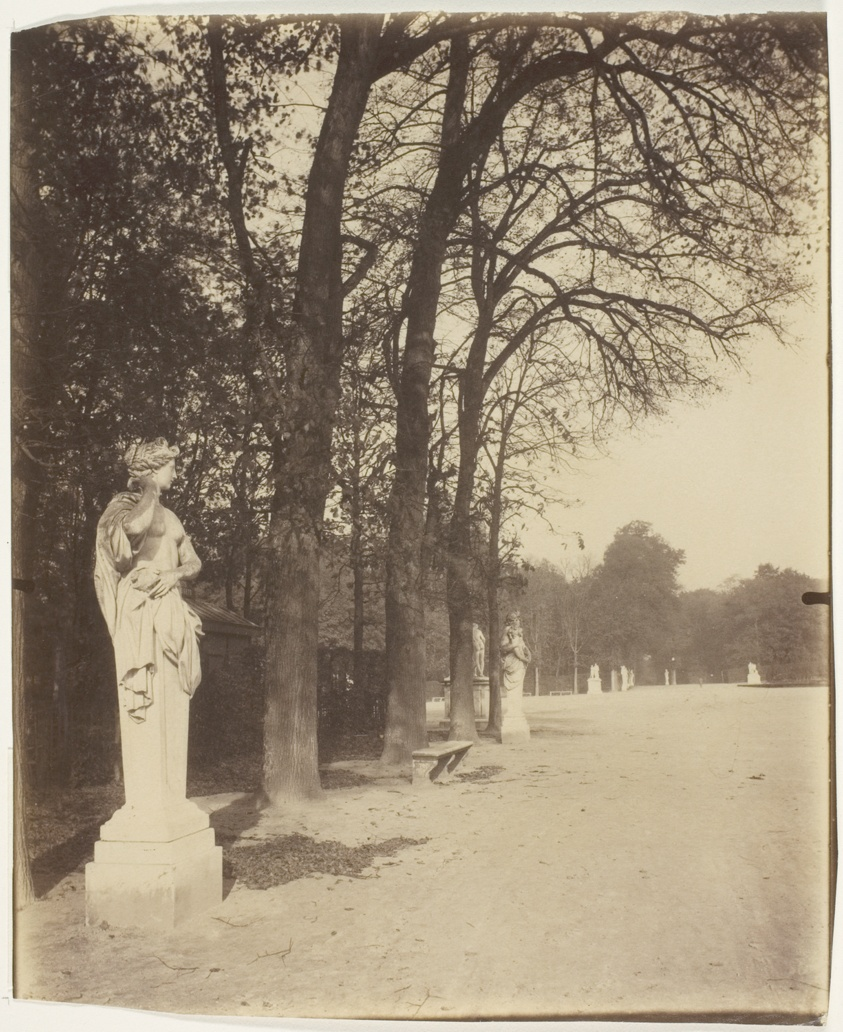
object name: Photograph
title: Versailles, Coin de Parc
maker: Jean-Eugène-Auguste Atget (French, 1857–1927)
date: 1904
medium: Albumen print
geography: France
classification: albumen silver print; photographic process; photography; photograph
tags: Collected by Hugh Edwards